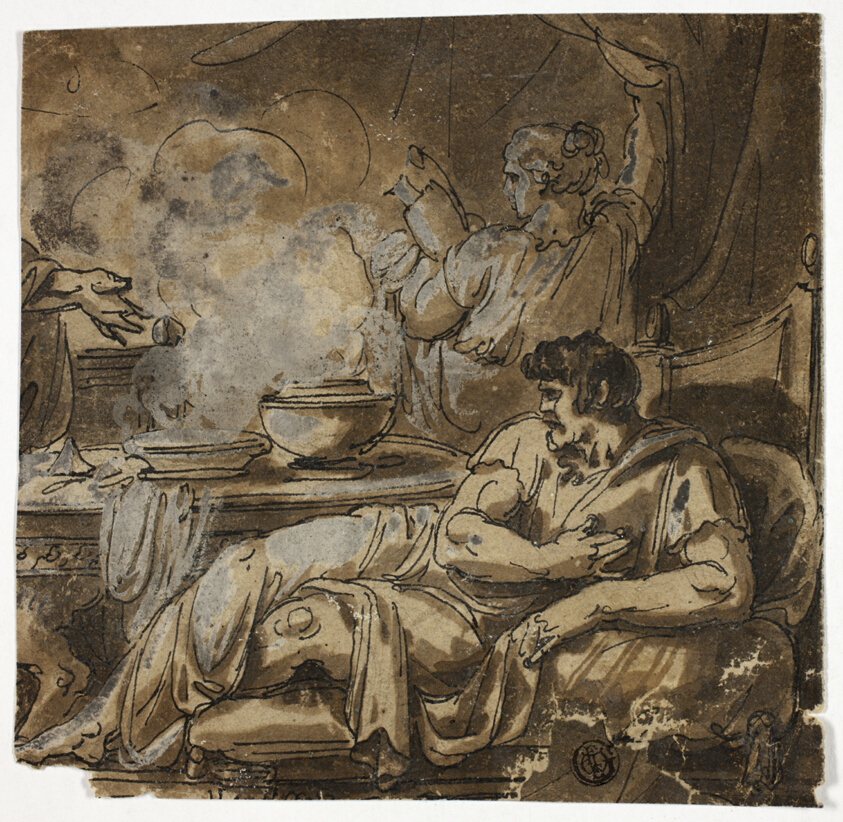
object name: Drawing and Watercolor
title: Magician Healing Sick Man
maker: Attributed to Felice Giani; Italian, 1758-1823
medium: Pen and brown ink, with brush and brown wash, heightened with lead white (partly discolored), over traces of black chalk, on tan laid paper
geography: Italy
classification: drawings (visual works); prints and drawing